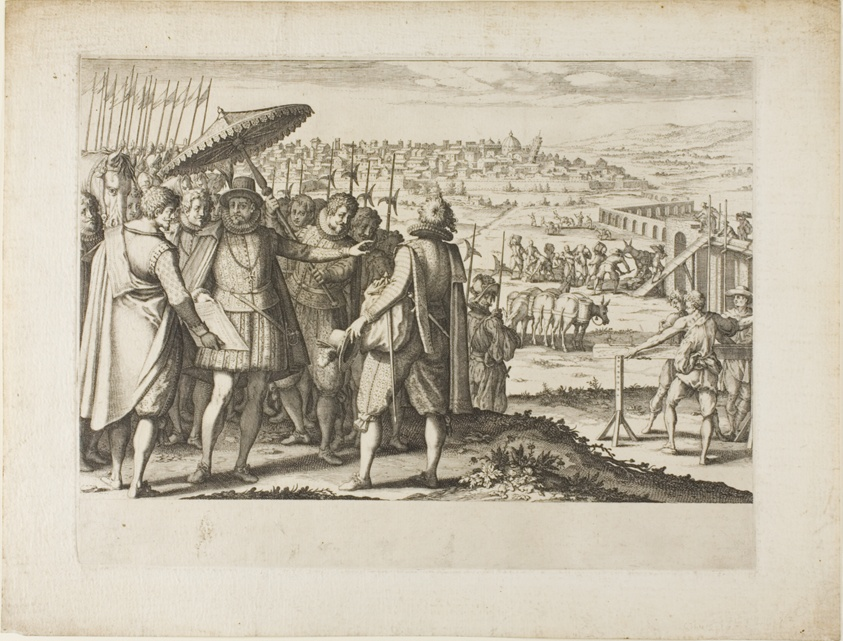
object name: Print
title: Restoration of the Aqueduct of Pisa, from The Life of Ferdinand de' Medici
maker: Jacques Callot (French, 1592-1635)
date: 1616/20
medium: Engraving on cream laid paper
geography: France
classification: engraving; print; prints and drawing